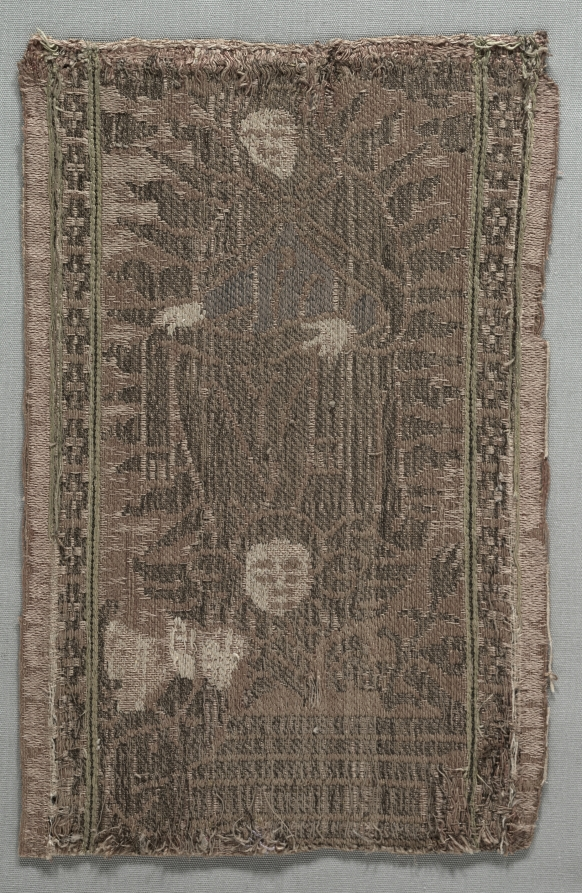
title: Orphrey Band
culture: Italy, Florence, 2nd half of 15th century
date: 1450–99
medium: compound weave (lampas) with gold brocade; silk and metal thread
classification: Textile